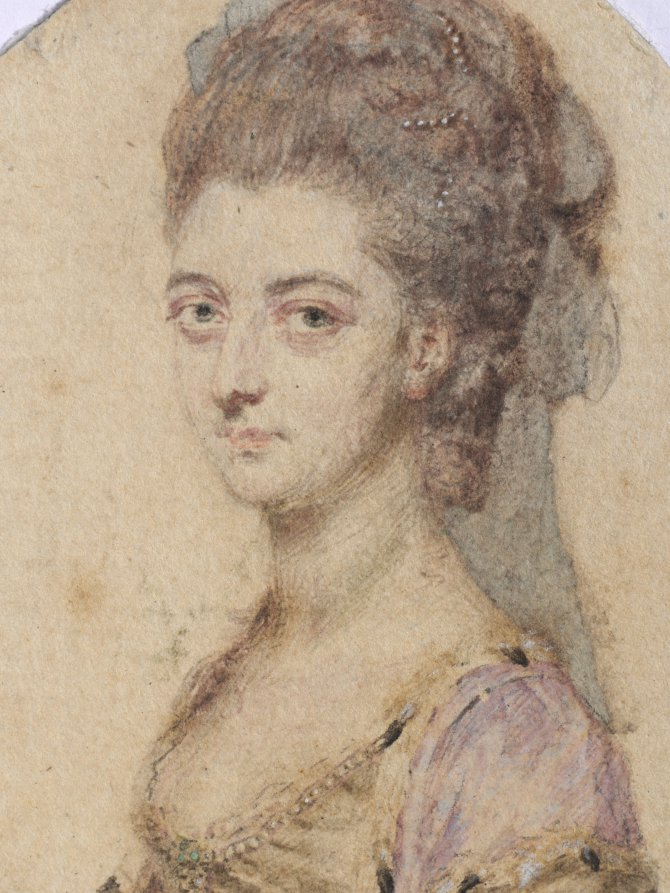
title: Portrait of Charlotte Bertie, née Warren, 4th Countess of Abingdon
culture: England, 18th century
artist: John I Smart (British, 1741–1811)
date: 1778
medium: graphite and wash on laid paper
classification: Portrait Miniature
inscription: inscribed on verso of paper to top in brown ink: [L]ady Abingto[n] 1778; inscribed at bottom of verso in graphite: J Smart / Lady Abington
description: Although it is impossible to say if it was always part of the artist’s process to execute a preparatory sketch prior to painting each miniature, we do know that John Smart retained many hundreds of these sketches. A group of preparatory sketches—of which this portrait is one—descended through the Smirke family after Smart’s daughter Sarah gave a sketchbook containing preparatory portrait studies to her friend Mary Smirke, sister of the celebrated Victorian architect Sydney Smirke. This book was probably broken up around 1877 when it was divided between Sydney’s daughters Mary Jemmett and Mrs. Lange, whose portions were both sold at auction in 1928. G. C. Williamson was the first to suggest that Smart’s sketches were well known and that they were preparatory studies for the painted miniatures. Williamson listed the names of sitters from the sketches known to him at the time, and they included Lady Abingdon. Here, Lady Abingdon’s head and shoulders face right. Her brown hair is dressed high on her head, and a strand of pearls is woven through the left side of her coiffure. A veil descends from the top of her head, past her shoulders. She has gray eyes. Compared to his contemporaries George Engleheart (1752–1829) and Andrew Plimer (1763–1837), whose female sitters were often painted in similar simple white gowns, Smart often lavished more attention on the costumes in his portraits of women, whose dresses incorporated colored silks, printed fabrics, and luxury trimmings like lace and fur. Thus, Lady Abingdon wears a low-necked, pink dress trimmed with ermine and strands of pearls. The background is unpainted. The removal of the paper backing revealed an inscription in brown ink, written in Smart’s hand, dating the work and verifying the identity of the sitter as Lady Abingdon. Lady Abingdon (d. 1799) was the daughter of Admiral Sir Peter Warren, K.B., M.P. She married Willoughby Bertie, 4th Earl of Abingdon, in 1768. They had six children, two of whom died very young. It is for Lady Abingdon that Abingdon Square in New York City is named, courtesy of her father, who had purchased 300 acres of land in Greenwich Village in 1744. Her husband’s famous protestations against the British government’s treatment of America during the War for Independence ensured that even in 1794, when the New York city council was rooting out British names from public streets and spaces, the name of Abingdon Square was retained. The family was painted by some of the great artists of the day, including Nathaniel Dance-Holland (1735–1811) and John Francis Rigaud (1742–1810). The formal portrait of 1769 by Dance-Holland, in which Lady Abingdon is depicted in coronation robes and holding her peeress’s coronet, conveys the pomp and tradition expected from a marriage portrait of a powerful peer. But even Smart’s miniature portrait sketch of almost a decade later maintains some of this grandeur, depicting the countess with aristocratic bearing and wearing the rich ermine-trimmed gown to which her station entitled her. A miniature on ivory corresponds to this preparatory sketch, although it is dated 1777, suggesting that the sketch may have been executed the following year in preparation for a second version of the portrait. There are slight differences in the details of the dress, particularly the left sleeve—which has been lengthened—and a slight reduction in pearl and ermine trim. The portrait on ivory also has somewhat more softness in the facial features, but many of the details, including the veil and the lock of hair on the right shoulder, are extremely similar. The miniature’s current location is unknown.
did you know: Sketches helped John Smart work out the particulars of a portrait before commencing the miniature on ivory, and they were useful in the event that a duplicate might later be required.